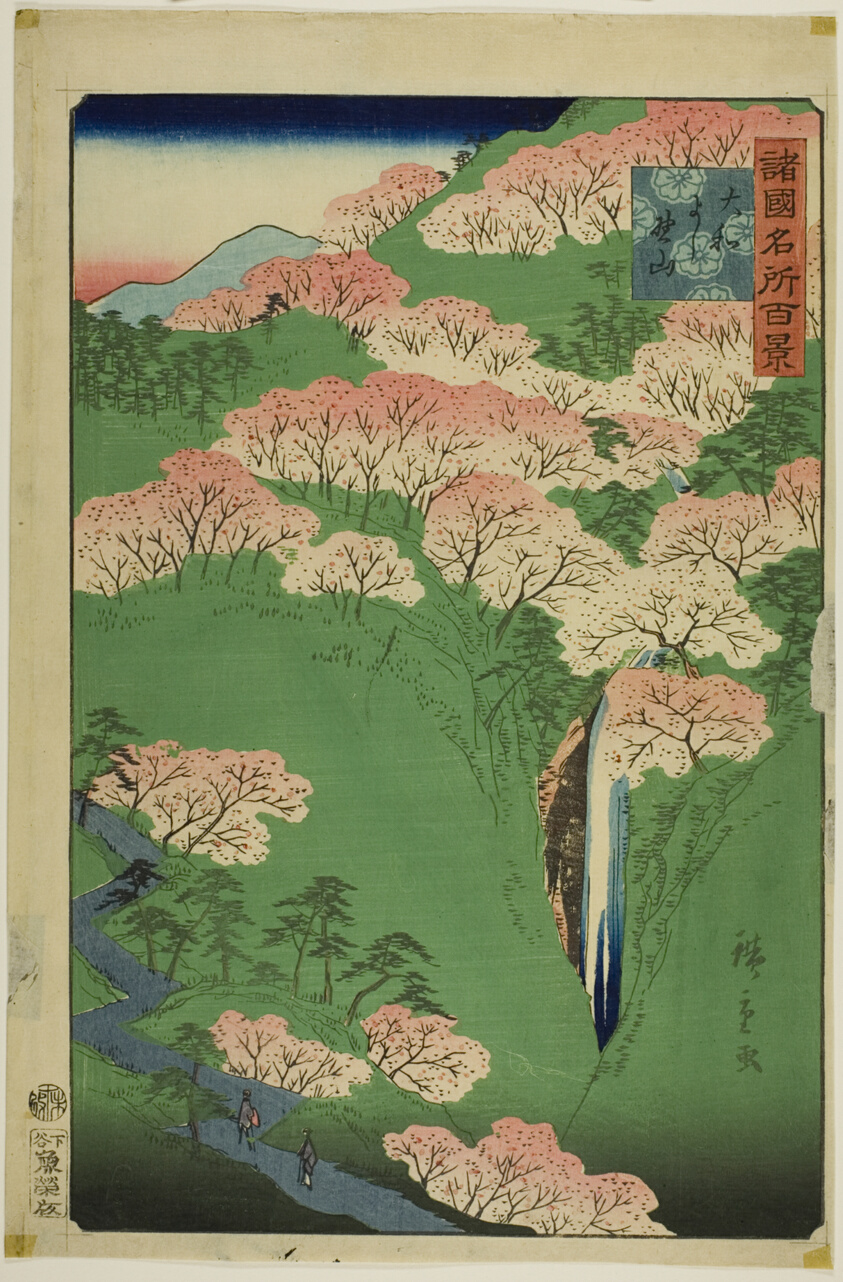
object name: Print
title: Mount Yoshino, Yamato Province (Yamato Yoshinoyama) from the series “One Hundred Famous Views in the Various Provinces (Shokoku meisho hyakkei)”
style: Japanese (culture or style)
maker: Utagawa Hiroshige II (Shigenobu) (Japanese, 1826–1869)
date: 1859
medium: Color woodblock print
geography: Japan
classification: woodblock print; print